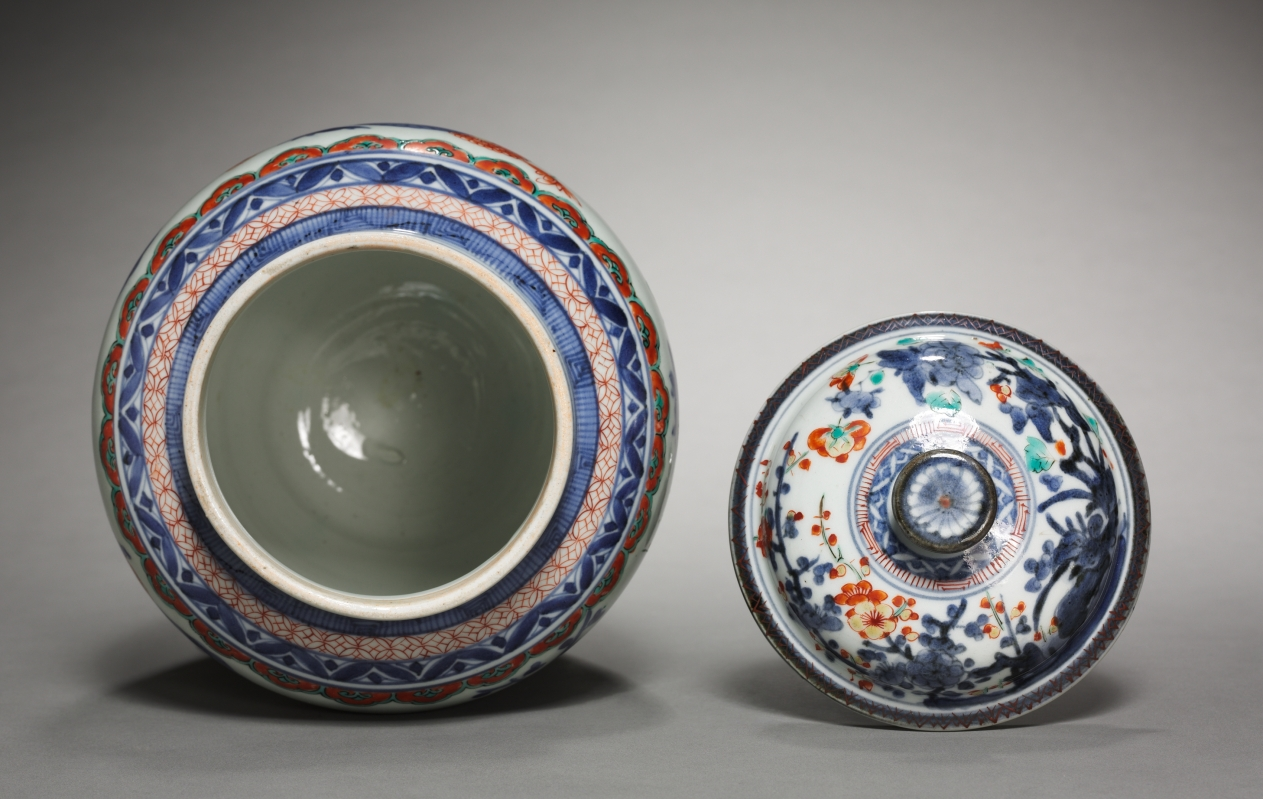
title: Covered Jar with Chrysanthemums, Peonies, and Plum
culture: Japan, Edo period (1615–1868)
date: late 1600s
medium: porcelain with underglaze blue and overglaze color enamel (Hizen ware, Kakiemon type)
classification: Ceramic